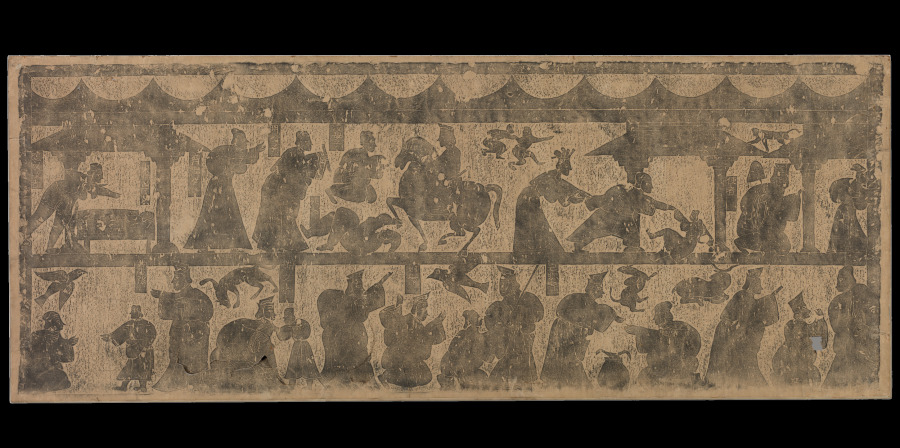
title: Rubbing of a Stone from the Tang-Fang Collection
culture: China, Qing dynasty (1644-1911) or Republican period (1912-49)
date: 1900–1916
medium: Rubbing, ink on paper, horizontal scroll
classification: Miscellaneous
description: This rubbing corresponds in composition with stone reliefs from the east wall in stone chamber 3 of the Wu Liang shrine. The upper register illustrates stories of virtuous women. Read from right to left, the last scene in the upper left corner shows a bed under a roof that is labeled “Virtuous Woman of the Capital.” The story relates that a woman was blackmailed into helping to kill her husband. She pretended to cooperate but took her husband’s place in bed. When the killers realized in the morning that they had decapitated the woman, they abandoned their murderous plan.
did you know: In the period before photography, life-size rubbings of sculptures and cultural relics from ancient sites were useful study material.